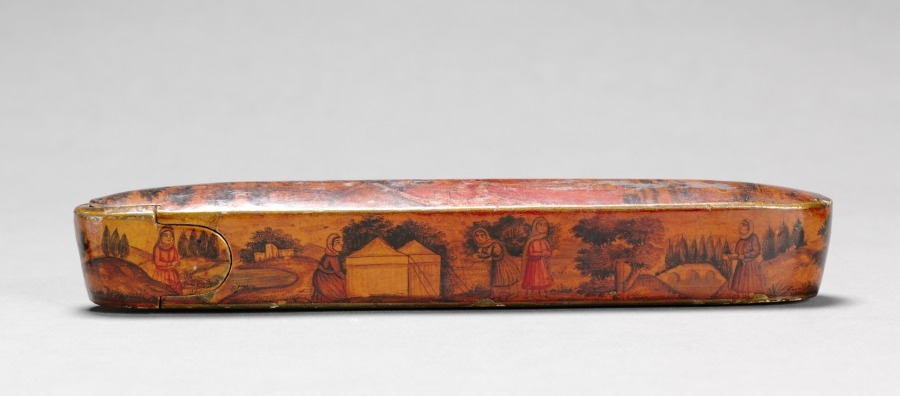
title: Pen and Ink Box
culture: Iran, Qajar period (1779-1925)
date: 1800s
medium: lacquer over papier maché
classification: Lacquer